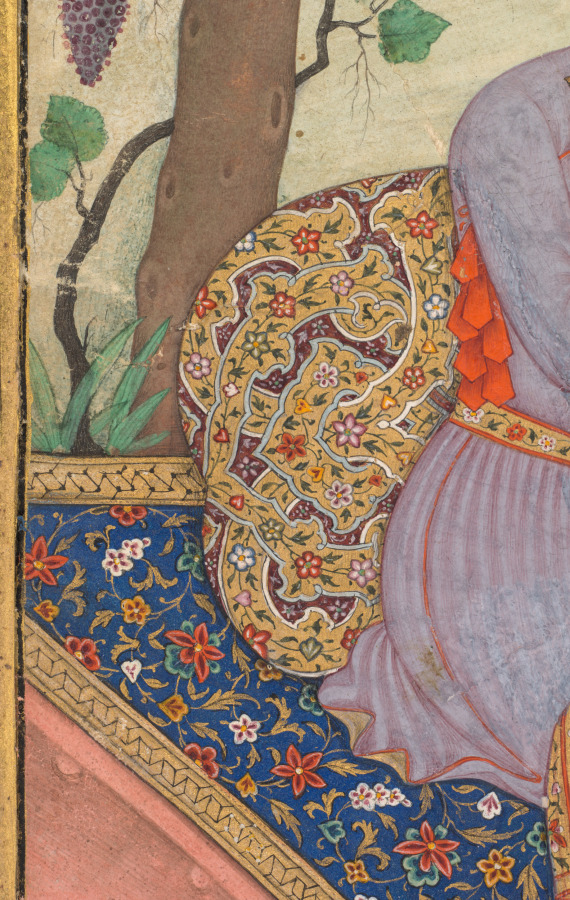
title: Lovers Embracing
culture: Mughal India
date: c. 1630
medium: Gum tempera and gold on paper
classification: Painting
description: The twining and coiling of the patterns on the carpet and large floor cushion mirror the interlaced bodies of the amorous couple. The clinging grapevine also references the wine they share from one cup. Such a carpet was not to be walked on, so the lovers do not wear shoes. It provides a luxurious furnishing to the intimate outdoor space. Here, the floral patterns evoke the pleasures of paradise. The textile patterns have been rendered with such precision that they appear like colorful enamel work or inlaid jewels. A covered golden box at right contains aromatic betel nut treats (paan) that freshen the breath.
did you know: Erotic metaphors in visual poetry: bees fly to blossoms as rain clouds approach.